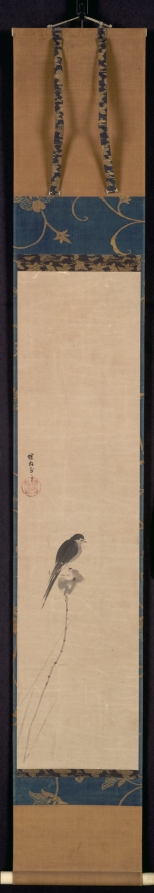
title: Bird on a Lotus Bud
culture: Japan, Edo period (1615–1868)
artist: Kano Tan’yū (Japanese, 1602–1674)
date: 1600s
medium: hanging scroll, ink on paper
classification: Painting